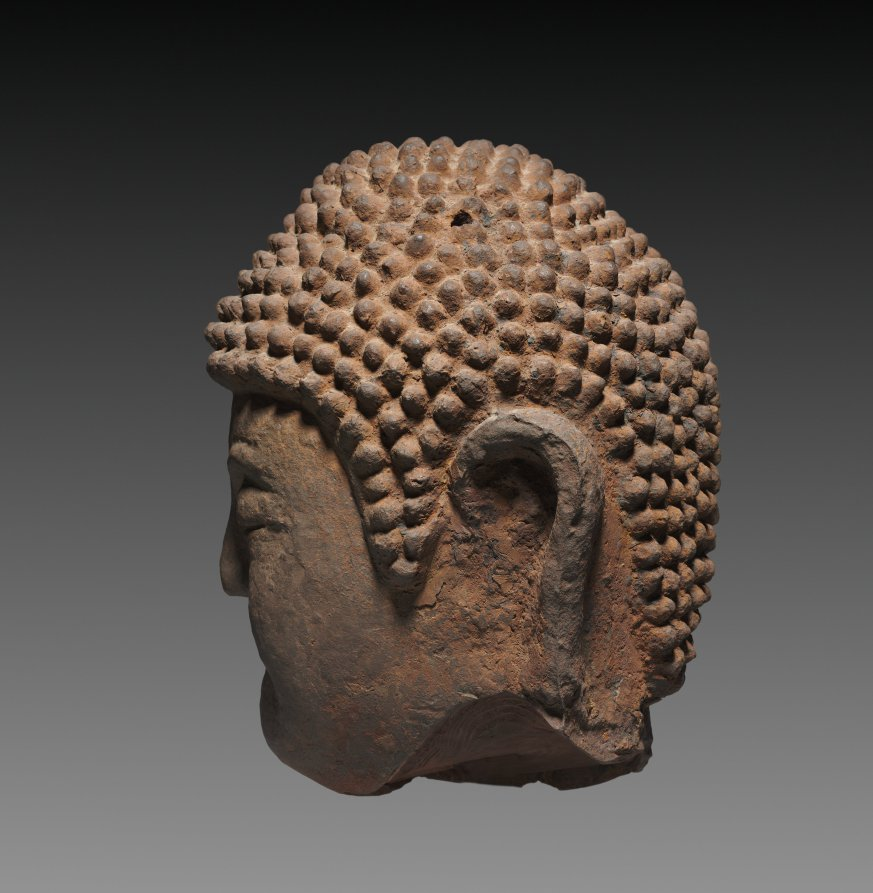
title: Buddha Head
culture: Korea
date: 1900s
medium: cast iron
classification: Sculpture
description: This Buddha has a soft and gentle smile, a typical attribute of Korean images of the Buddha. His plum cheeks and soft smile remind us of his childlike purity while his nearly closed eyes show him in a moment of meditation. The empty divot in the middle of the forehead would originally have contained a jewel symbolizing the light emanating from the Buddha. His head is topped with a profusion of snail-shell curls and an ushnisha, a mound symbolizing the Buddha’s enlightenment.